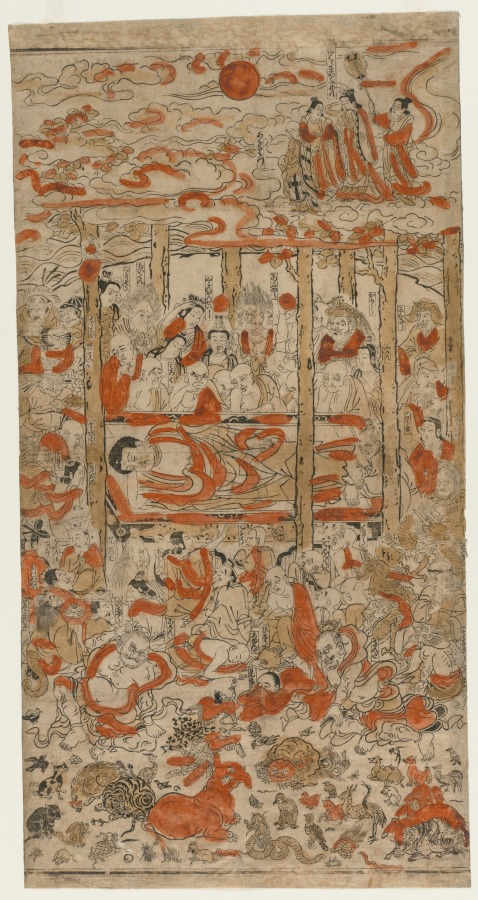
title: The Parinirvana of the Buddha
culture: Japan, Edo period (1615–1868)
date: c. 1710s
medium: color woodblock print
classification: Print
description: This print records a religious rather than secular event, depicting the transition of the historical Buddha Shakyamuni from mortal to eternal being. On a cloudy night under a full moon, the Buddha lies on a platform on his right side with his right hand behind his head. His followers surround him in various states of grief, curiosity, or calm acceptance. An old woman at the Buddha’s feet and other lay believers are present, along with a host of Buddhist deities. The Buddha’s mother, two attendants, and a monk appear at the upper right. The multitude of animals acknowledges that the Buddha’s law applies to all living creatures. Note that various rectangular cartouches identify the followers. This rare image is the earliest hand-colored print in the museum collection. It was hand-colored in yellow and red (tan), and in many instances, the coloring does not follow the outlines of the key block. All printed versions of this subject are based on earlier paintings; the earliest woodcut of this event dates to 1402.